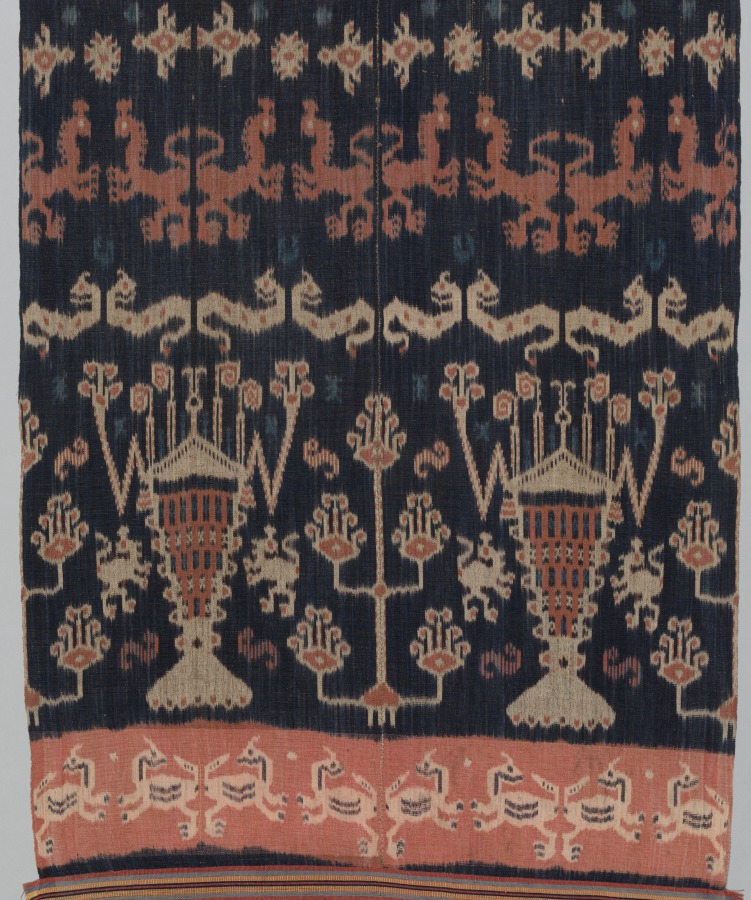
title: Hinggi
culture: Indonesia, Sumba, early 20th century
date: early 1900s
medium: cotton, ikat dyed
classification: Textile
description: Each hinggi consists of two panels stitched together down the center and often, as in this mantle, finished at either end with a band woven with supplementary warps. The geometric motif repeated across the center of this hinggi is a symbol of royalty; the rampant lions, borrowed originally from European coats-of-arms, designate royal power; the large marine shrimp signify longevity, while the Trees of Life between the shrimp symbolize fertility; and the paired deer in red bands at either end are emblems of royal privilege since the hunting of deer was, traditionally, the prerogative of the king.